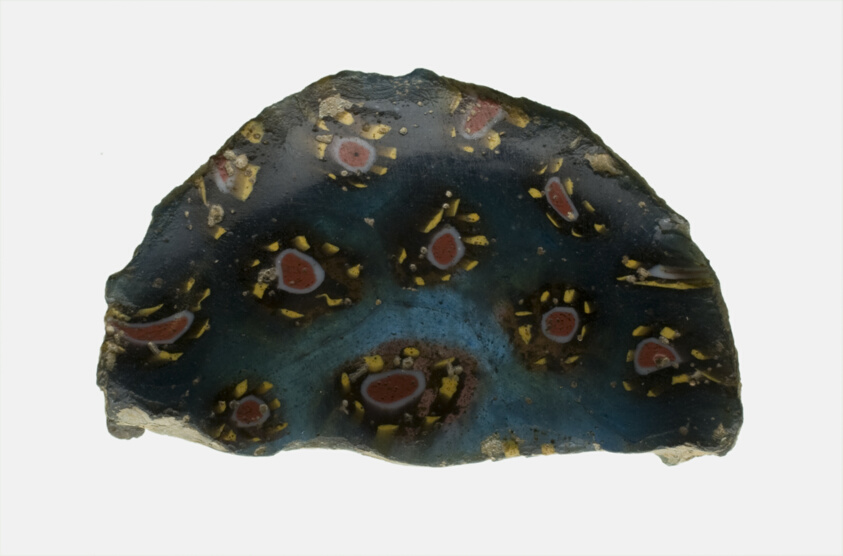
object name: Decorative Arts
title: Fragment of a Bowl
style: roman (ancient, style or period), ancient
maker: Roman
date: 1st century BCE–1st century CE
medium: Glass, mosaic technique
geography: Roman Empire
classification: fragment; decorative arts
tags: decoration